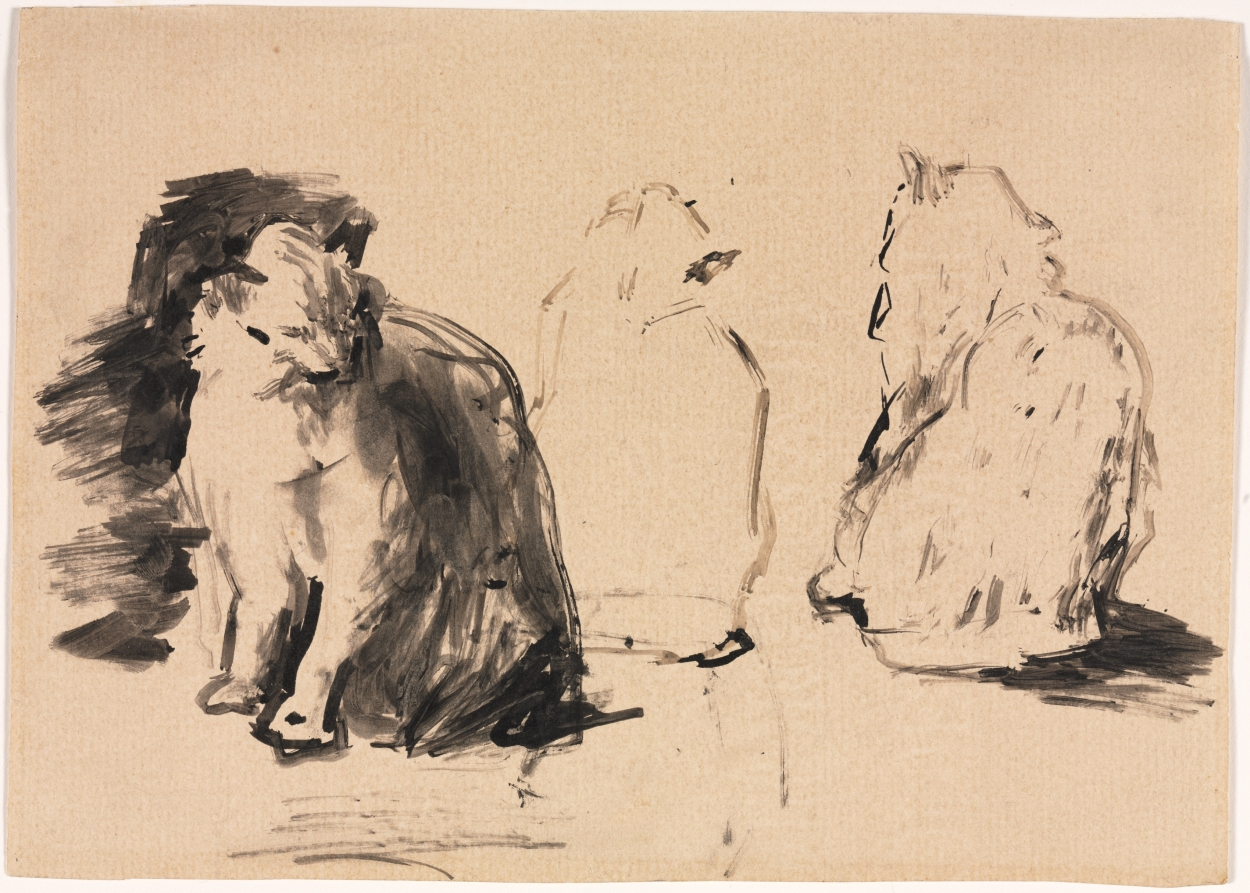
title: Cats (recto)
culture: France, 19th century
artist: Théodule Ribot (French, 1823–1891)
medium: black ink applied with pen (reed) and brush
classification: Drawing